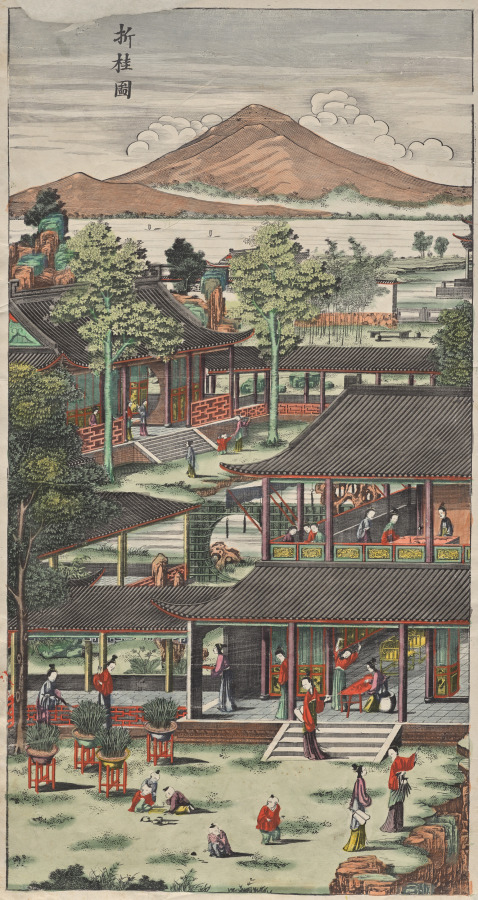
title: Gathering Osmanthus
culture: China, Qing dynasty (1644–1911), Qianlong reign (1736–95)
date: 1736–95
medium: Polychrome woodblock print; ink and color on paper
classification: Print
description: In the 1600s, printing flourished in such Jiangnan cities as Nanjing, Suzhou, Hangzhou, and Huizhou, evolving from privately enjoyed illustrated books printed in color to more commercialized single-sheet color prints that were hung on walls and became part of the rich urban visual culture.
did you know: Woodblock printing in color reached a height in China in the 1600s to 1700s. The prints were executed by means of sets of separate blocks, each carved to print a different color.